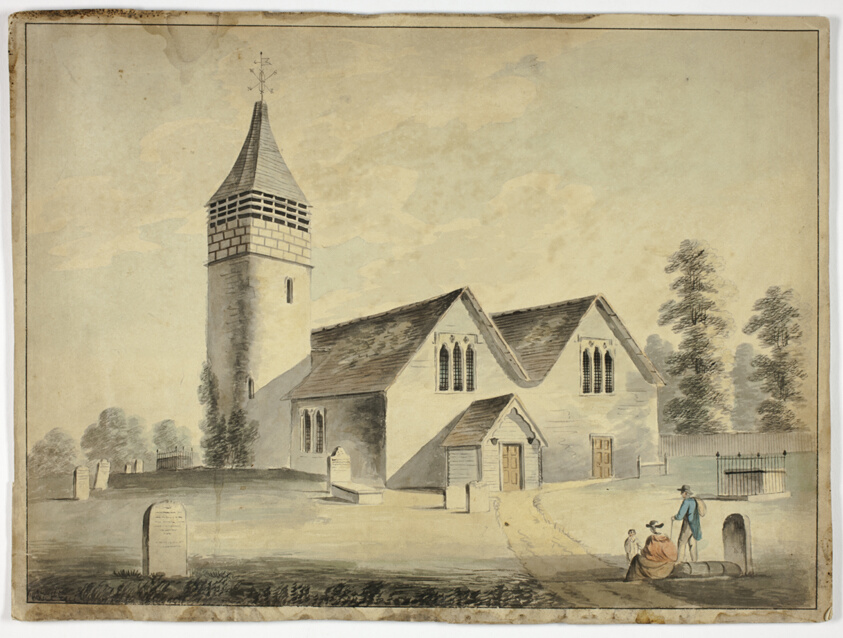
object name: Drawing and Watercolor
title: Man, Woman and Child in Churchyard Cemetary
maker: Unknown artist (British, 1800-1899)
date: 1800-1899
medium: Watercolor on tan wove paper, laid down on tan laid paper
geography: United Kingdom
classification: watercolor; drawings (visual works); prints and drawing